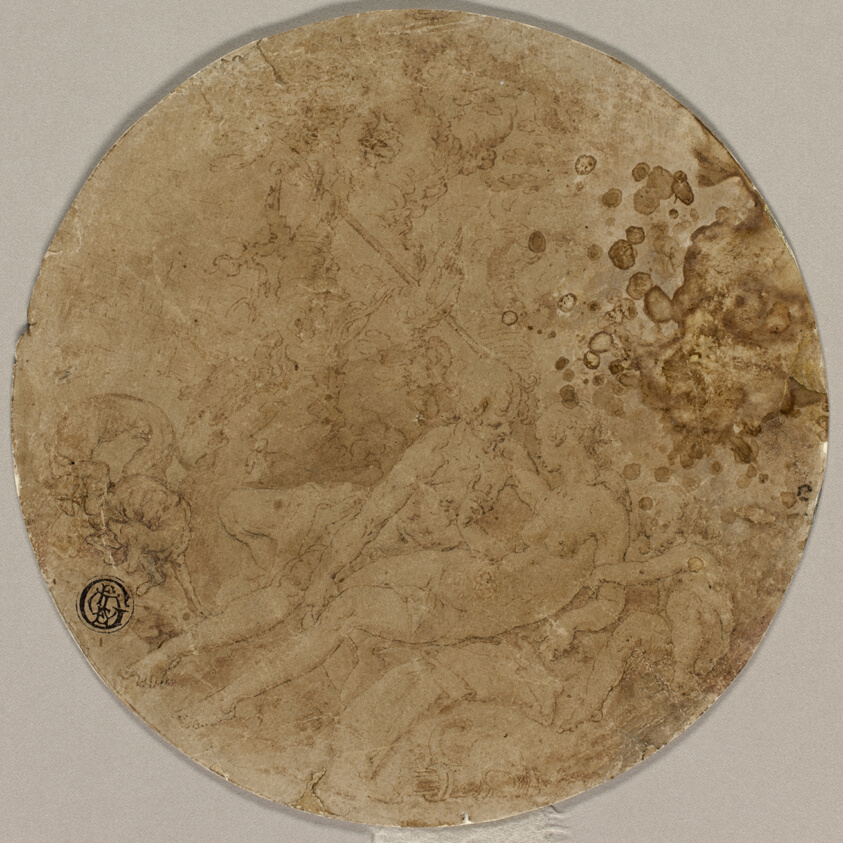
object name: Drawing and Watercolor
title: Venus and Adonis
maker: Attributed to Joachim Antonisz. Wtewael; Dutch, c. 1566-1638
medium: Pen and brown ink, with brush and brown wash, on tan laid paper, laid down on ivory wove paper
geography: Netherlands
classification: pen and ink drawings; drawings (visual works); prints and drawing